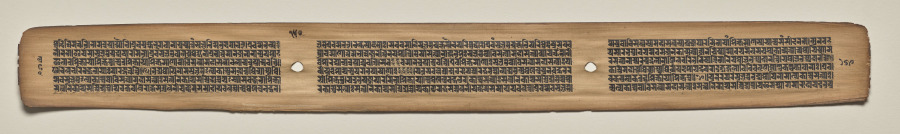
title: Text, Folio 150 (verso), from a Manuscript of the Perfection of Wisdom in Eight Thousand Lines (Ashtasahasrika Prajnaparamita-sutra)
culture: Eastern India, Bihar, Vikramashila Monastery. Painting: Nepal, Kathmandu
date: Sunday, September 14, 1119 (year 239 of the Newar Samvat in the month of Ashvina)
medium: gum tempera and ink on palm leaves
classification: Painting